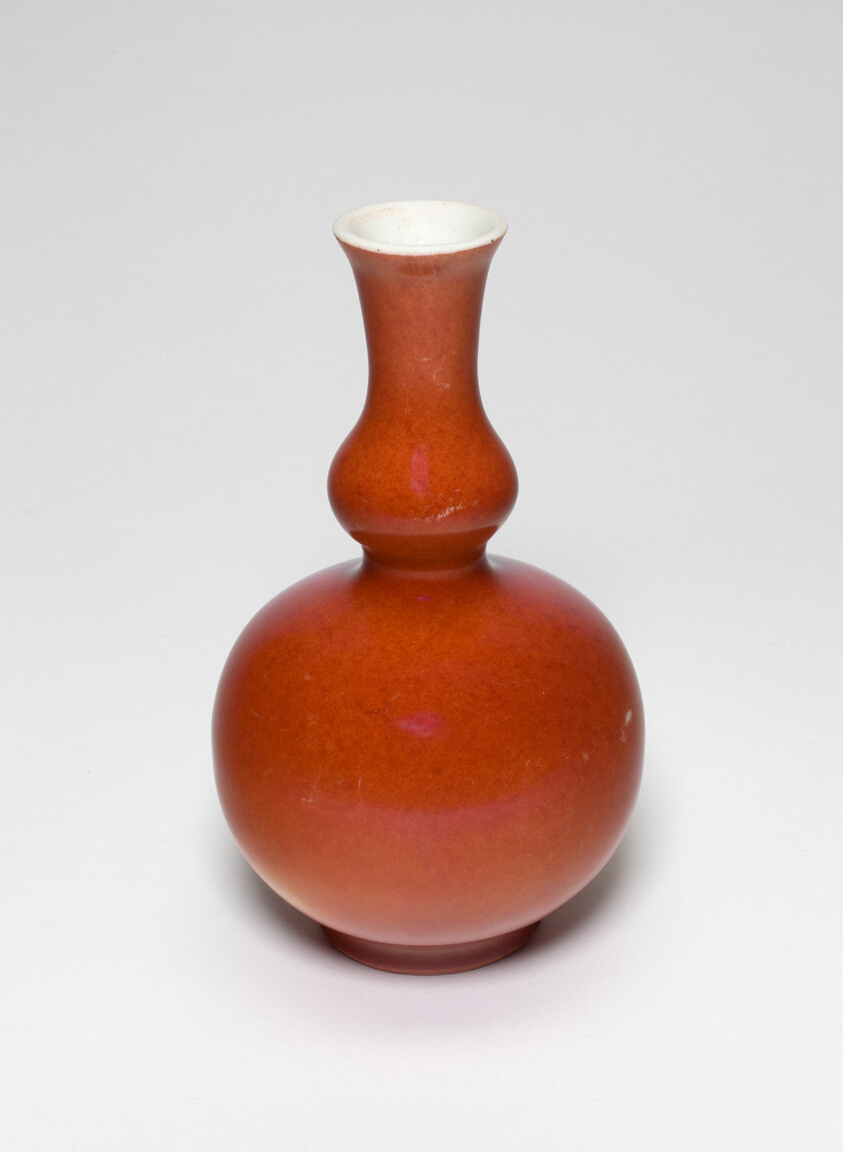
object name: Vessel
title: Double Gourd-Shaped Vase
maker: China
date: Qing dynasty, Kangxi period (1662–1722)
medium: Porcelain with coral red glaze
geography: China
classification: porcelain; asian art; ceramics